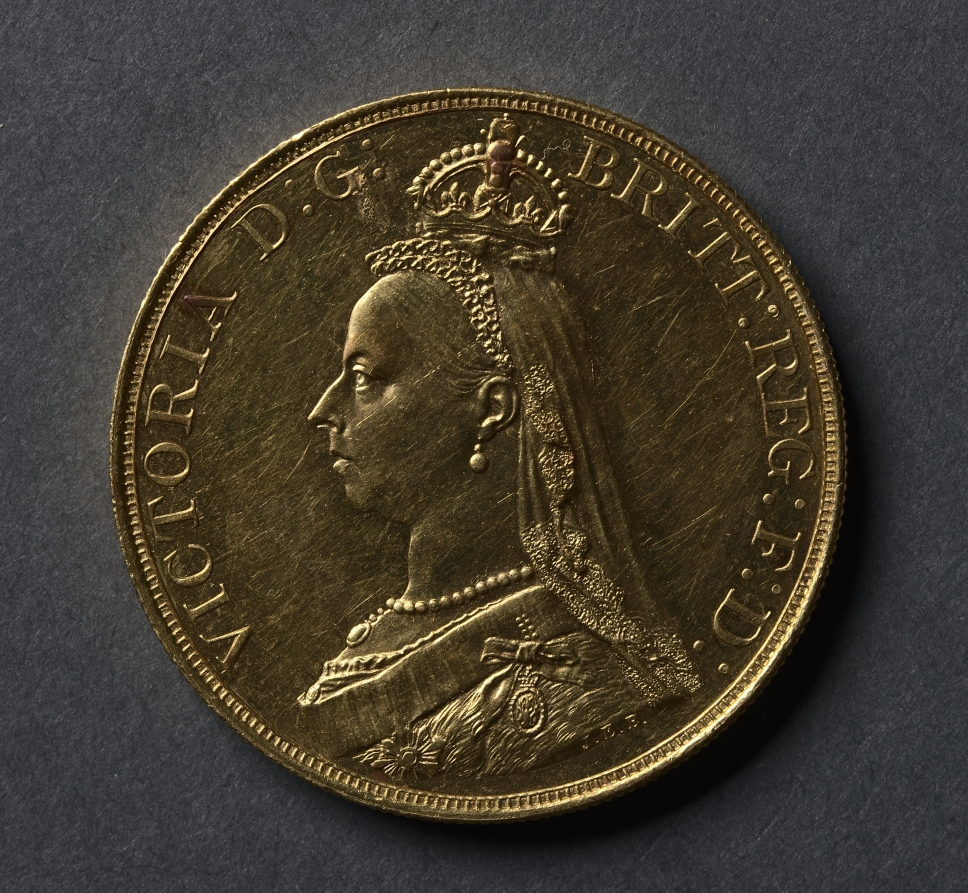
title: Five Pound Piece: Portrait of Queen Victoria (obverse)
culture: England, Victoria, 1837-1901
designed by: Joseph Boehm (British, 1834–1890)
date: 1887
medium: gold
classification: Coins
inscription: VICTORIA D: G: BRITT: REG: F: D: